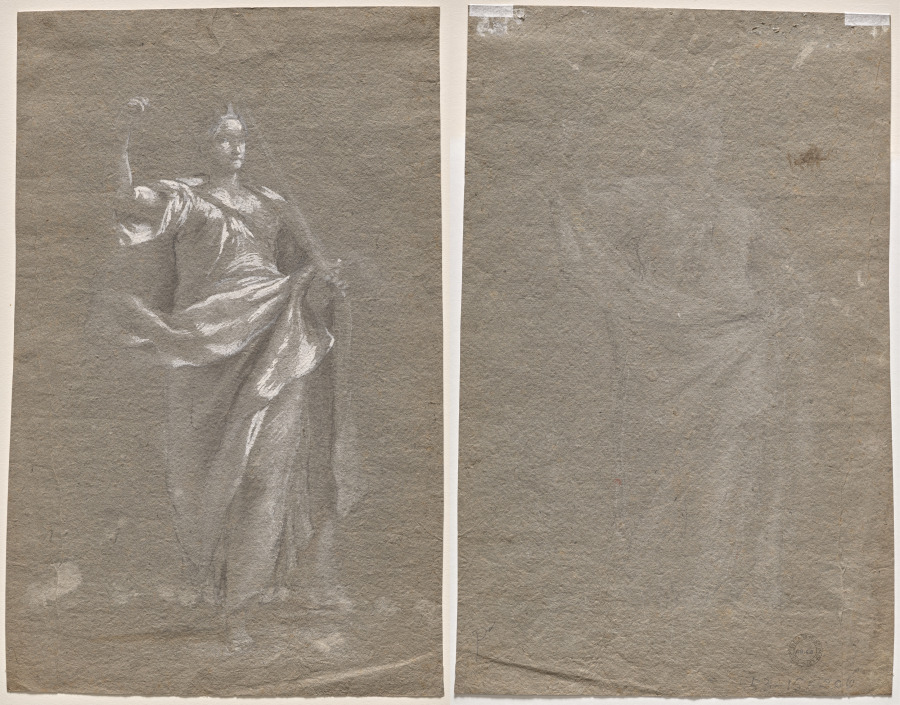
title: Allegorical Figure (recto and verso)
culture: Italy, style of 17th century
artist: Anonymous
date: 1800s?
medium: black chalk and brush and brown and gray wash heightened with white and gray gouache, with traces of stylus and white chalk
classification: Drawing